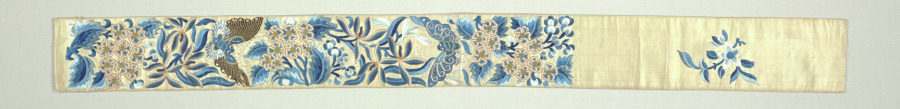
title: Sleeve Band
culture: China, Qing dynasty (1644-1911)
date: 1800s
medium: Silk, satin weave, embroidery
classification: Garment